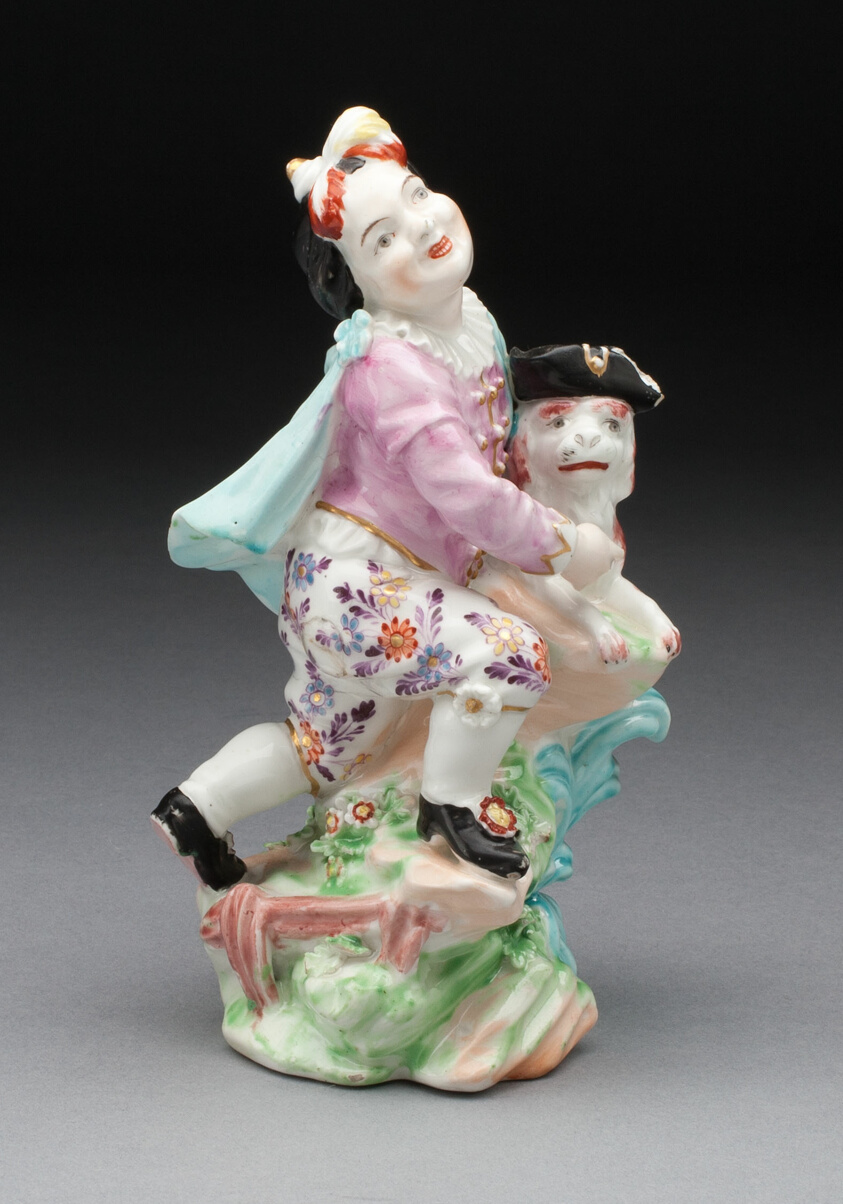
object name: Ceramics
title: Boy with Dog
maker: Chelsea Porcelain Manufactory; London, England, c. 1745-1784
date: c. 1760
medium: Soft-paste porcelain, polychrome enamels and gilding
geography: Chelsea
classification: porcelain; european decorative arts; ceramics